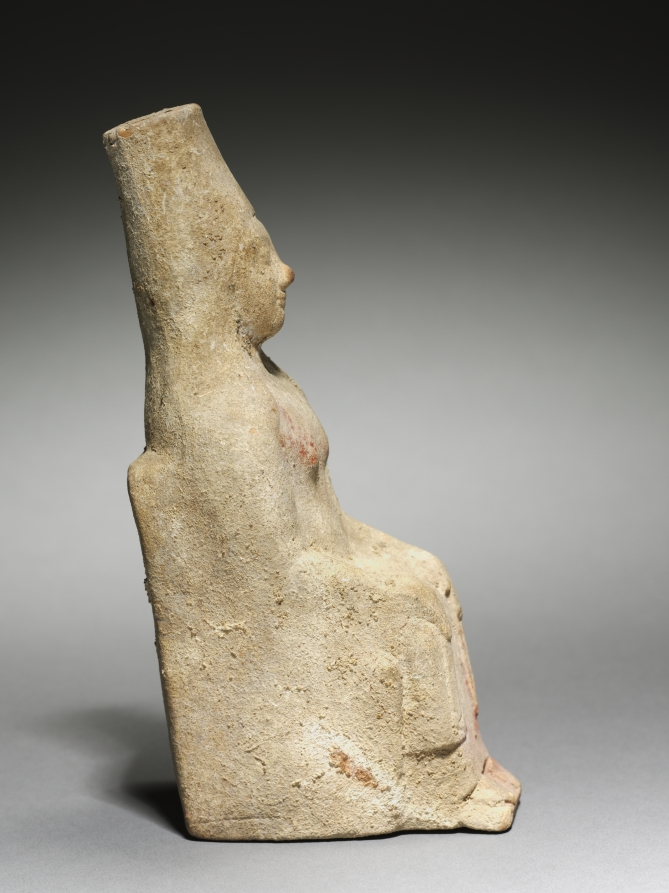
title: Seated Goddess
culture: Greece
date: 500s BCE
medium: terracotta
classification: Sculpture